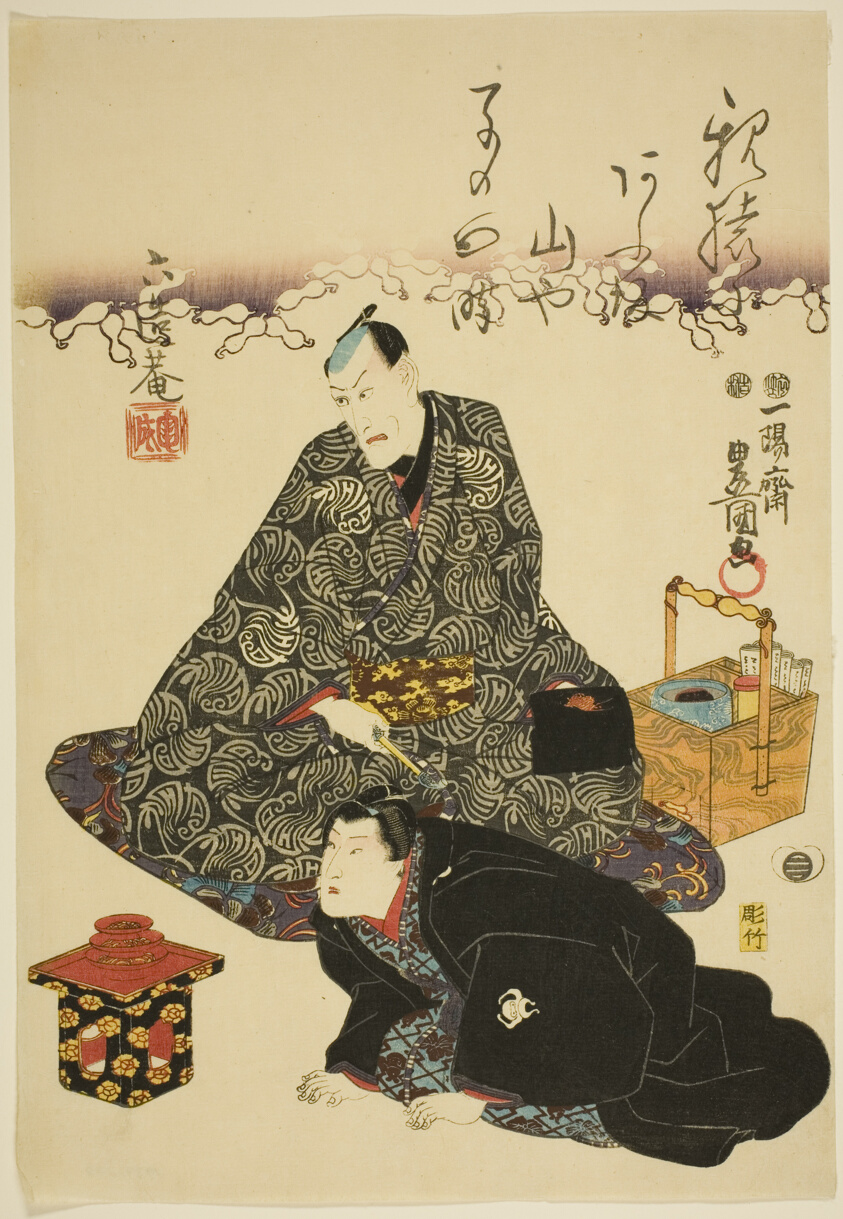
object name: Print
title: The actors Ichikawa Ebizo V and Ichikawa Saruzo I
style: Japanese (culture or style)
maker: Utagawa Kunisada I (Toyokuni III) (Japanese, 1786–1864)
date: 1849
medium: Color woodblock print; right sheet of oban diptych (left: 1937.272b)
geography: Japan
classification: print; asian art